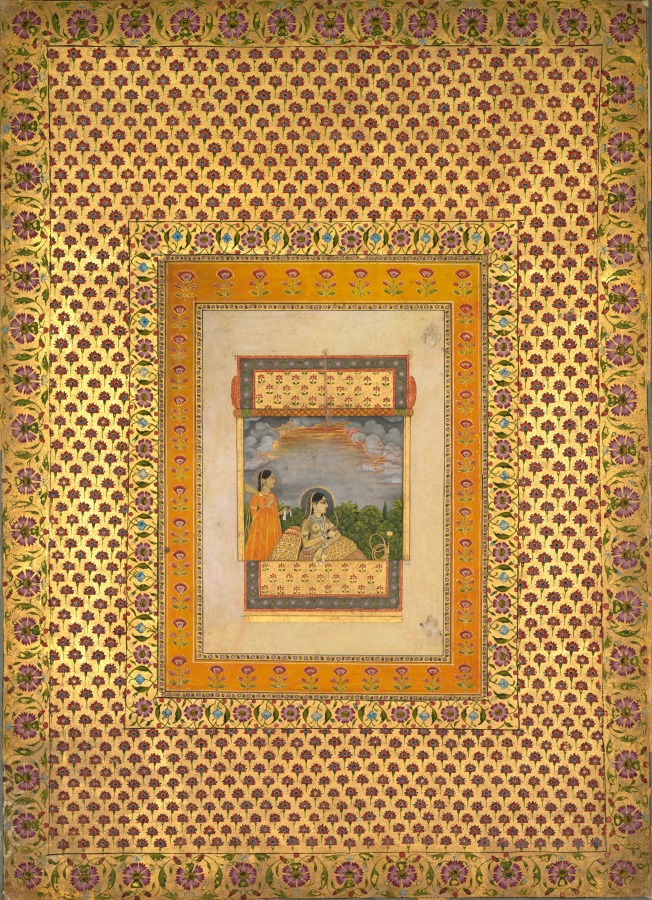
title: Princess and attendant in trompe l’oeil window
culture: Mughal India, Uttar Pradesh, Lucknow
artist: Aqil Khan (Indian, active mid-1700s)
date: c. 1765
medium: Gum tempera, ink, and gold on paper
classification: Painting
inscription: 'amal 'Aqil Khān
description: A golden window shade has been rolled up to reveal a princess seated on a terrace. The carpet draped over the sill echoes that of the balcony rail where royals would show themselves to the public. Rather than taking the view of an outsider, the viewer looks from inside the palace out to the women and the wooded landscape beyond. During the mid-1600s, the Mughal court introduced a preference for the patterns on carpets and textiles: flowering plants on a plain ground. This influential fashion derived from their appreciation of European botanical studies that merchants and diplomats brought to India.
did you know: Unlike in portraits of the emperor, women sit on the outside of the royal window.